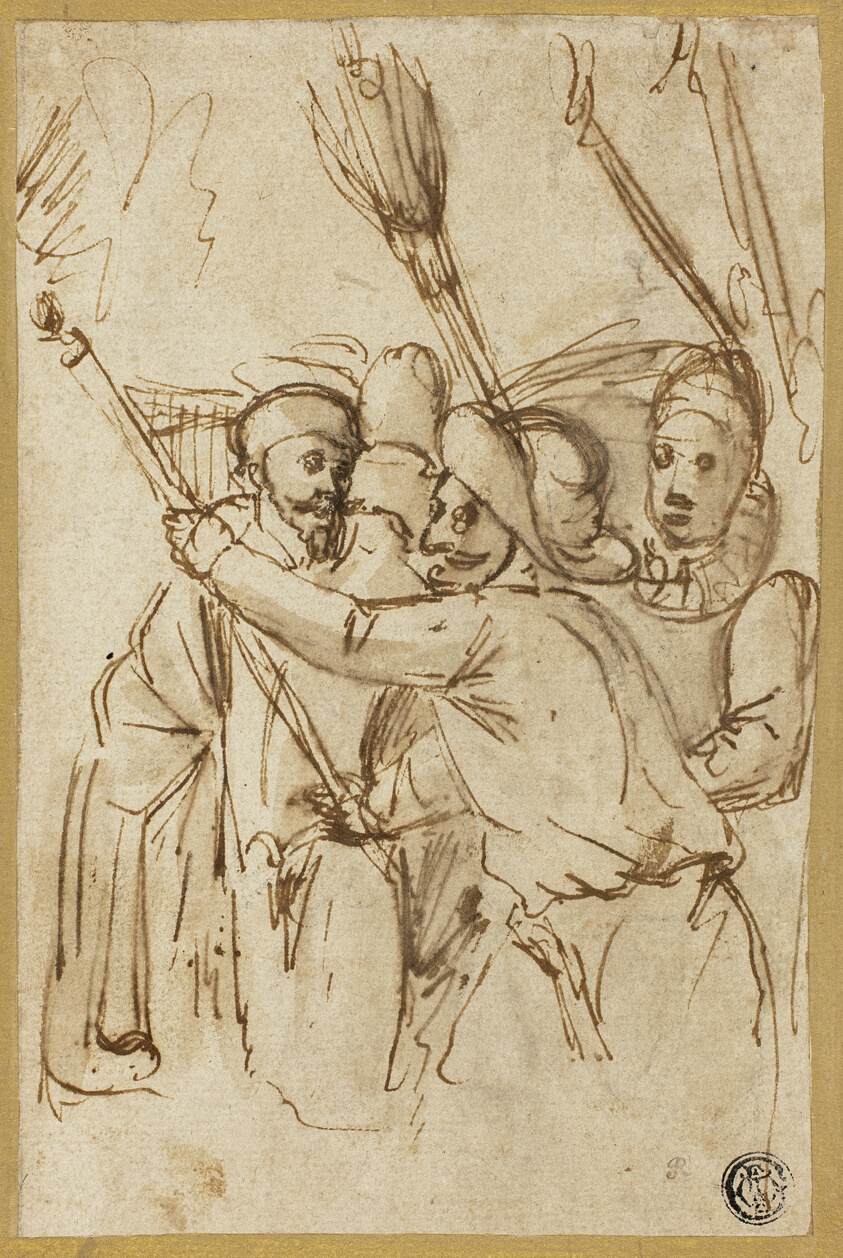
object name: Drawing and Watercolor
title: Carnival Figures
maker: Attributed to Antonio Carracci (Italian, 1583-1618); or possibly Agostino Carracci (Italian, 1557-1602)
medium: Pen and brown ink with brush and brown wash, on ivory laid paper, laid down on cream laid card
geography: Italy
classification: pen and ink drawings; drawings (visual works); prints and drawing